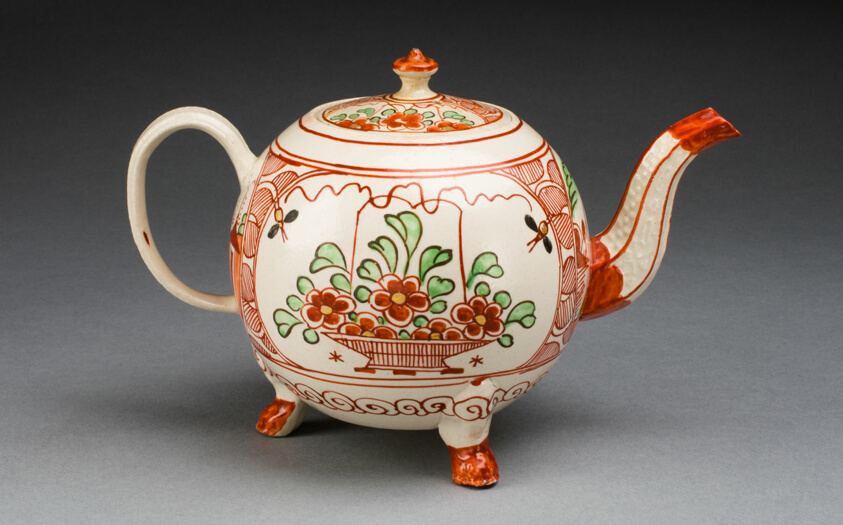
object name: Ceramics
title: Teapot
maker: Staffordshire, England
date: c. 1760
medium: Salt-glazed stoneware, polychrome enamels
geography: Staffordshire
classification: teapot; salt-glazed stoneware; pottery; stoneware; european decorative arts; ceramics